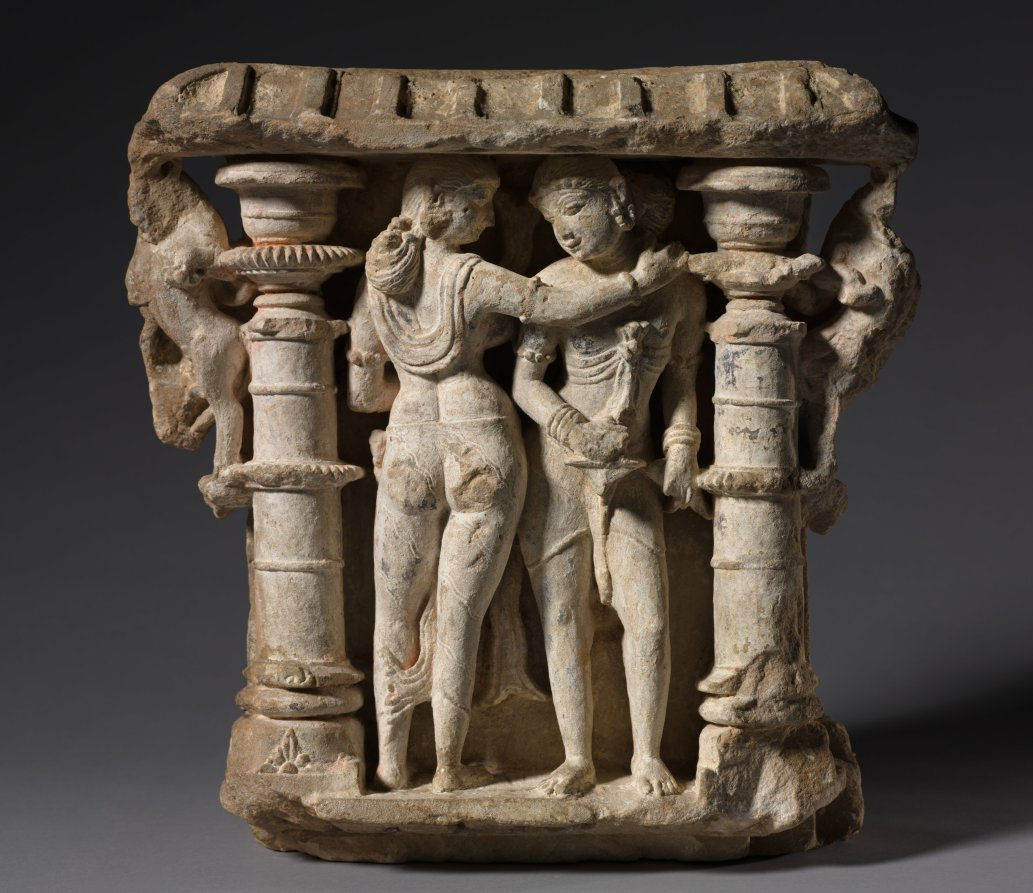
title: Lovers (Mithuna)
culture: Northwestern India, Rajasthan, Sikar, Harshagiri, Pratihara Dynasty, 10th Century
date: c. 973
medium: sandstonewith limestone wash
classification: Sculpture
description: Along with the adjacent architectural frieze with dancer and musicians, this tender scene was built into the exterior wall of the now ruined Purana Mahadeva Temple, dedicated to the Hindu god Shiva. Erotic imagery depicting couples interacting with each other in various postures were important components on the exterior of Hindu temples. They underscore the infinite beauty and abundance of the created world.